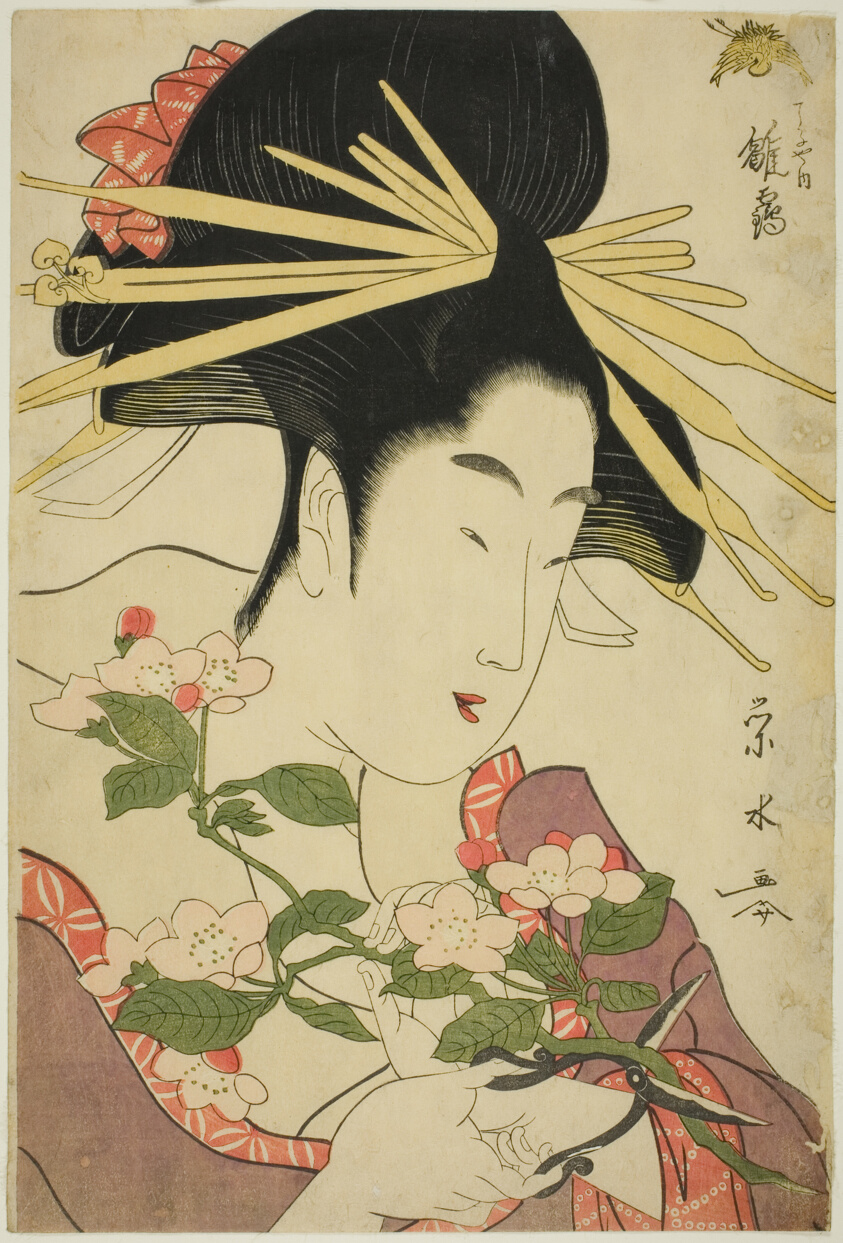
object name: Print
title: The Courtesan Hinazuru of the Chojiya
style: Japanese (culture or style)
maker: Ichirakutei Eisui (Japanese, active 1790-1823)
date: c. 1795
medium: Color woodblock print; oban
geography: Japan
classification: woodblock print; print; asian art